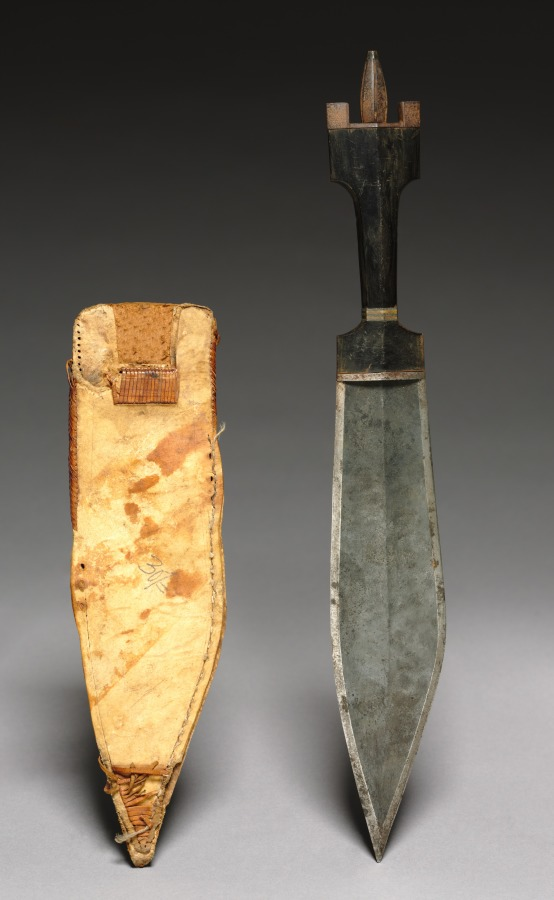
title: Knife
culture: Africa, East Africa, Somalia, unknown maker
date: early 1900s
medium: Iron, rawhide or leather, and horn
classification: Arms and Armor